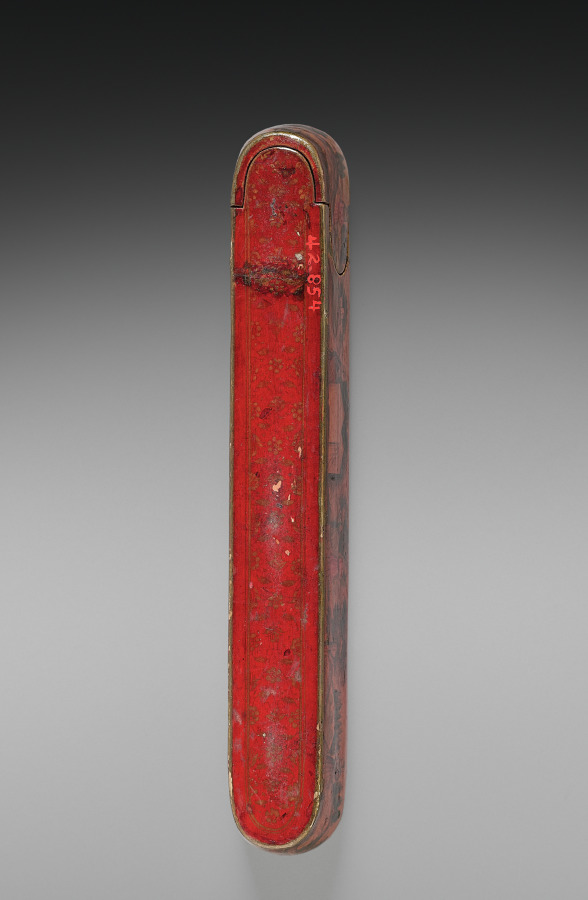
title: Pen and Ink Box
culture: Iran, Qajar period (1779-1925)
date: 1800s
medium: lacquer over papier maché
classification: Lacquer